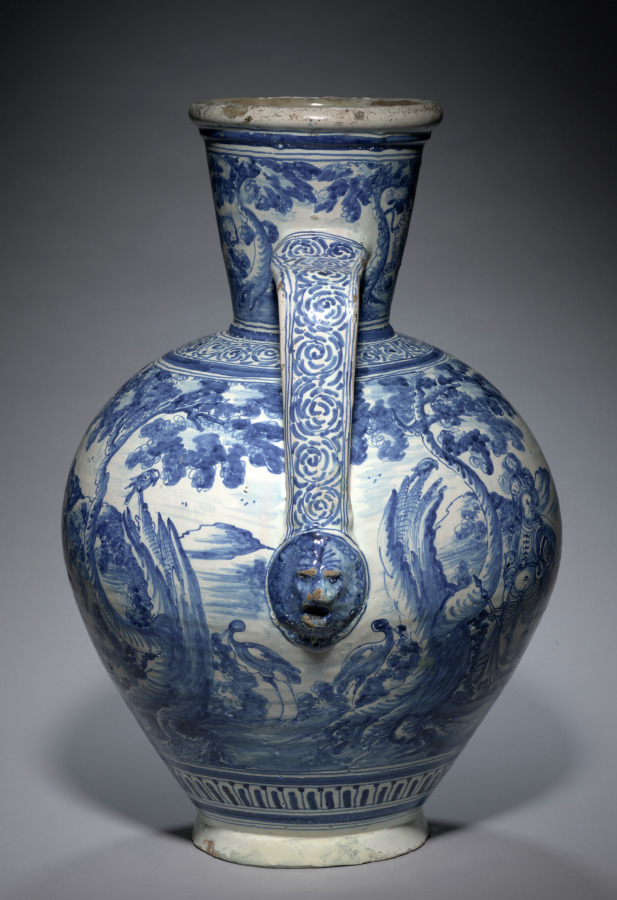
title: Two-Handled Jar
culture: Spain, Talavera, 17th century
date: early 1600s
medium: tin-glazed earthenware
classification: Ceramic